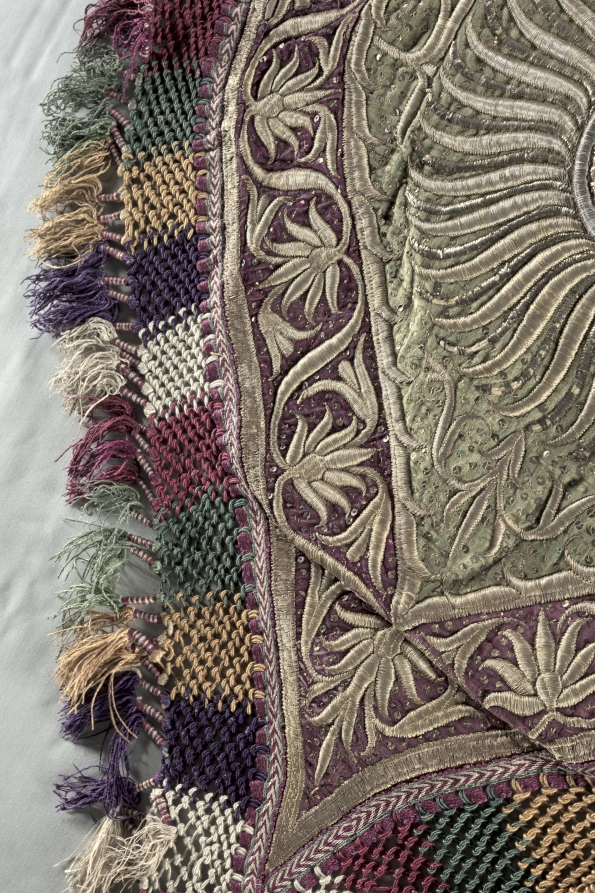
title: Embroidered Fragment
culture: India, 18th or 19th century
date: 1700s or 1800s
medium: embroidery; gold on velvet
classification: Embroidery